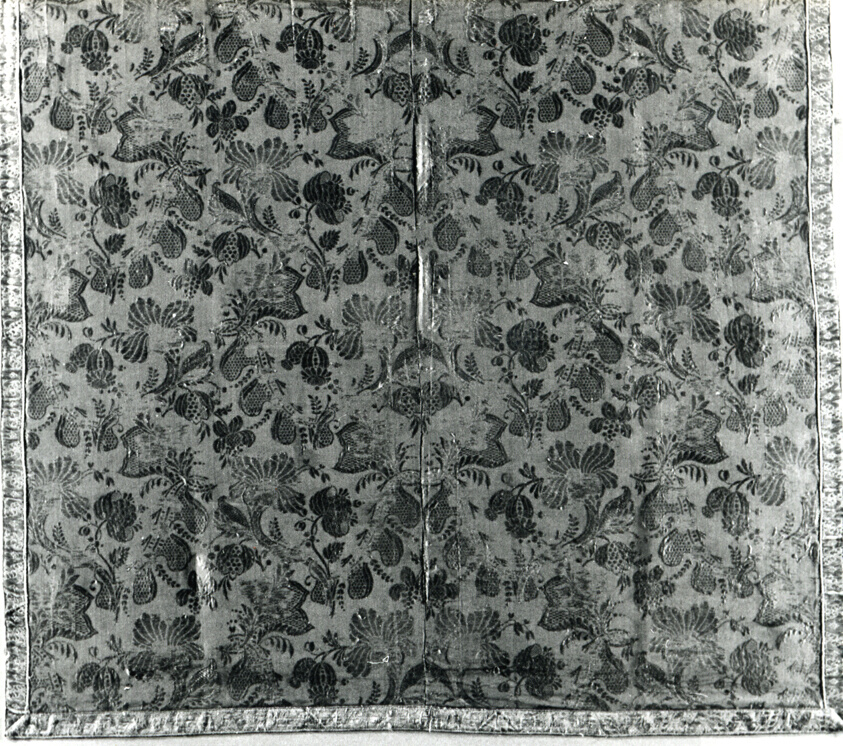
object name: Textile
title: Panel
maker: France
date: 18th century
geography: France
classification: textile; weaving